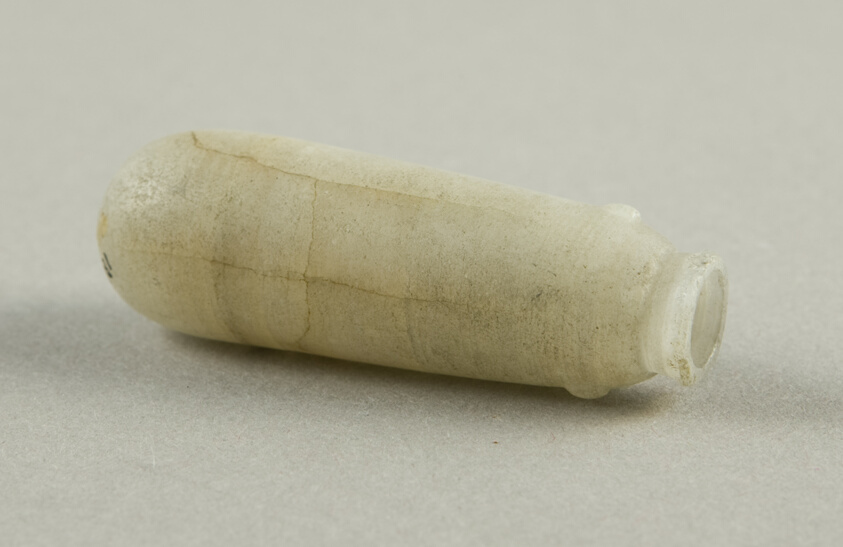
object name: Vessel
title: Alabastron (Container for Scented Oil)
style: late period (egyptian), egyptian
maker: Egyptian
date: Late Period, Dynasty 26–31 (?) (664–332 BCE)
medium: Travertine (Egyptian alabaster)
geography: Egypt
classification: alabastron; stone; vessel; ancient art